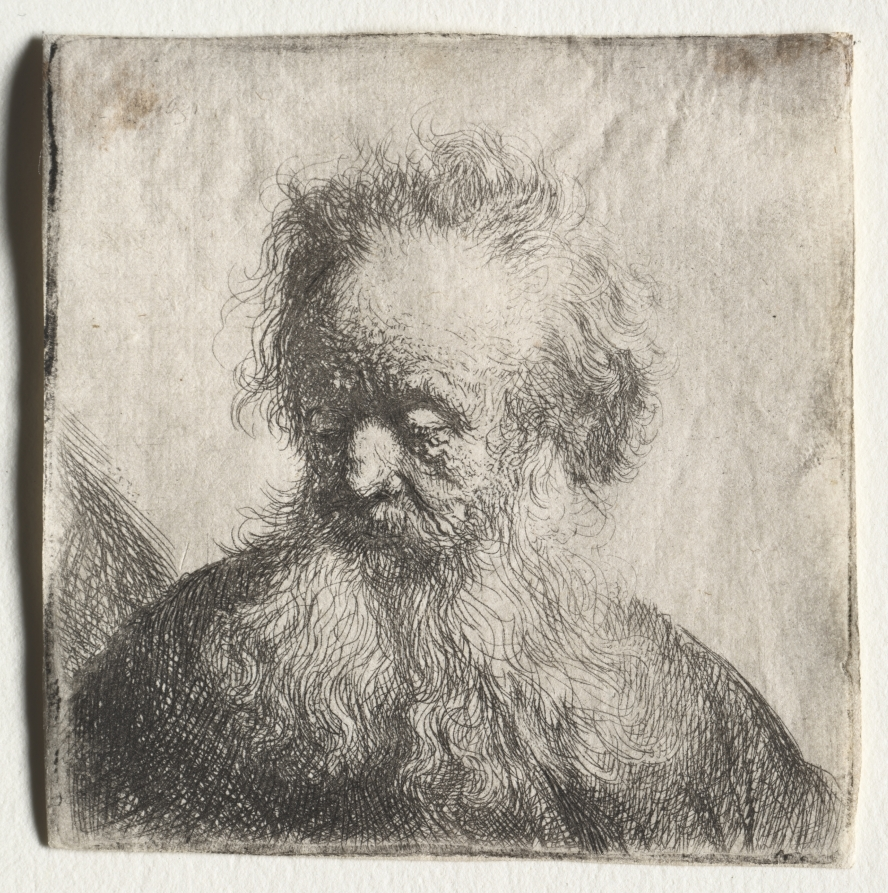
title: Old Man with a Flowing Beard: Bust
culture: Netherlands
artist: Rembrandt van Rijn (Dutch, 1606–1669)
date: 1631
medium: etching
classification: Print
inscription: upper left, in plate: RHL 1631 [in monogram] ; upper right, in pen and brown ink: [60?]8 [upsidedown] ; VERSO, center, in graphite: B. 315 I / H 48 I ; lower left, in pen and brown ink: 3 ; lower center, in graphite: Gers. No. 292